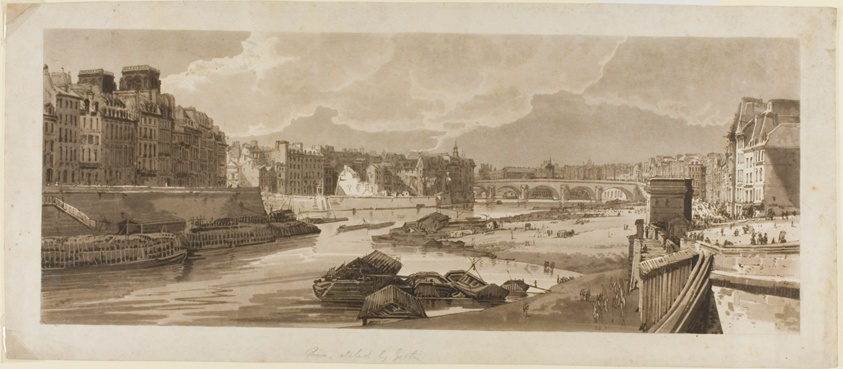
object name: Print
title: View of the City with the Louvre, etc., taken from Pont Marie, from A Selection of Twenty of the Most Picturesque Views in Paris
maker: Thomas Girtin (English, 1775-1802)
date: 1802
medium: Soft ground etching, with aquatint, printed in black and gray inks, on cream wove paper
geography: United Kingdom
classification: etching; paper; print; prints and drawing